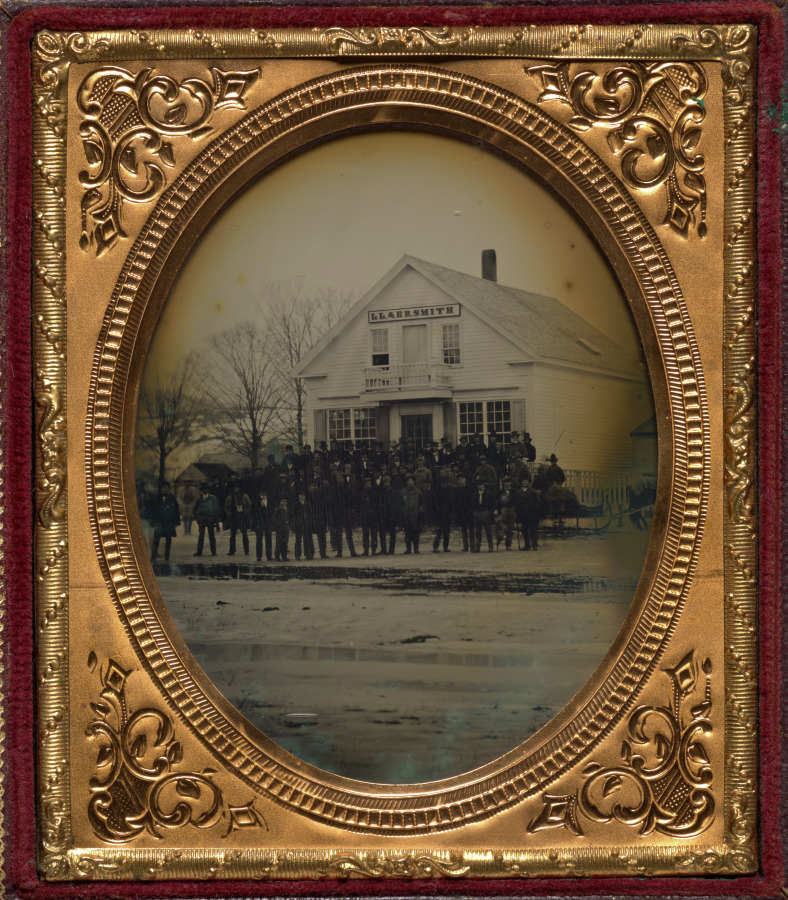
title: Crowd with sleigh in front of LL & ER Smith store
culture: America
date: c. 1858–65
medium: ambrotype, sixth plate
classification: Photograph